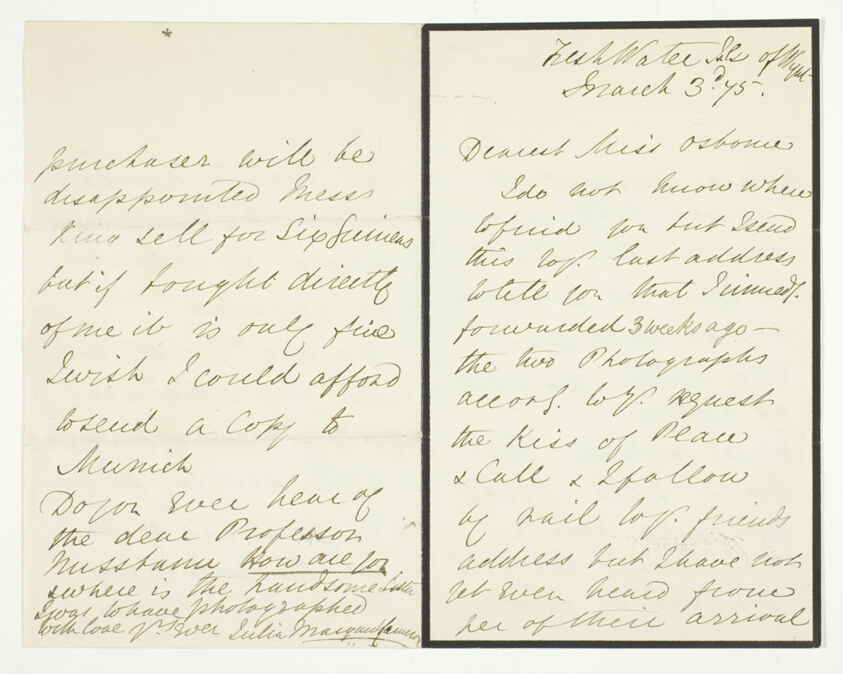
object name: Photograph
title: Autograph Letter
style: 19th century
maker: Julia Margaret Cameron (English, 1815–1879)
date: March 3, 1875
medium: Pen and ink, one page, double-sided autograph letter, signed Julia Margaret Cameron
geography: England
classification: pen and ink drawings; archival material; photography; photograph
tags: Collected by Hugh Edwards